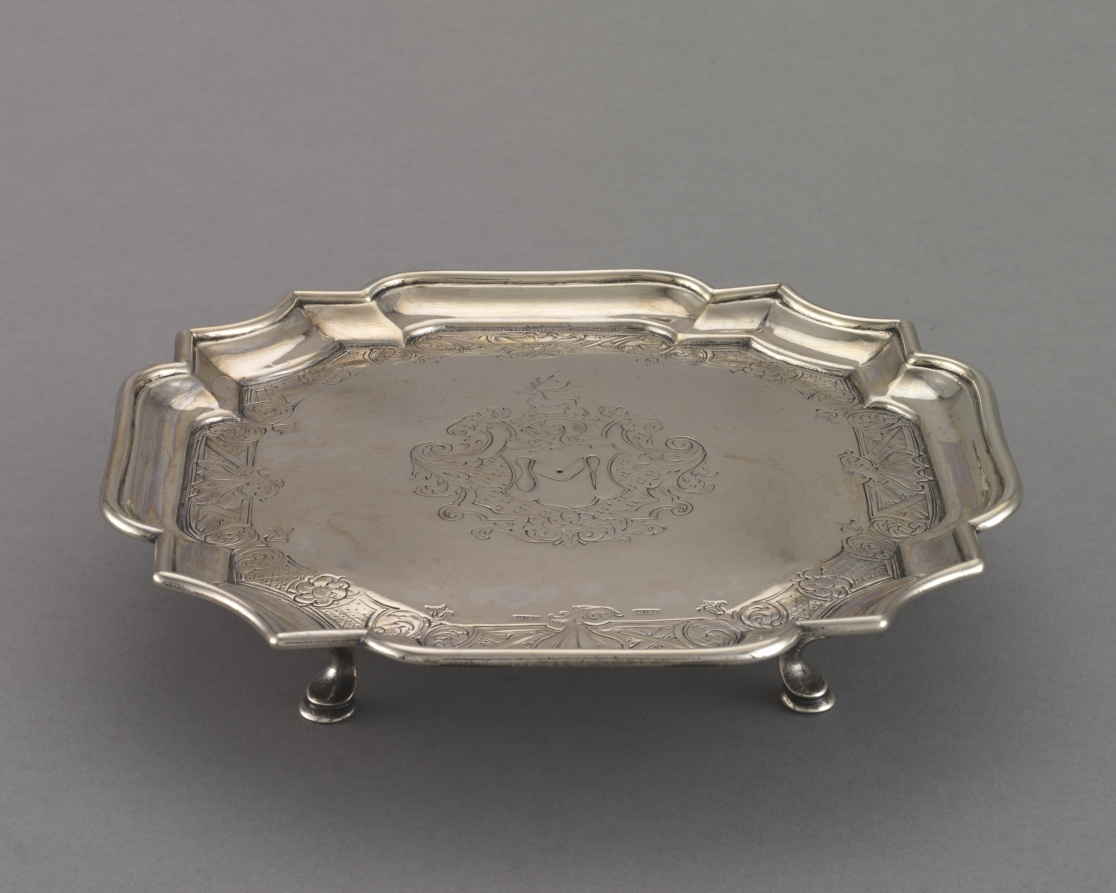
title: Salver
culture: America, Massachusetts, Boston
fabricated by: Jacob Hurd (American, 1702–1758)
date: 1740–50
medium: silver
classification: Silver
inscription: engraved: H over A + T over 1750 in shaded block letters underneath each salver.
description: The coat of arms is that of the Hastings family, the original owners of these serving pieces.